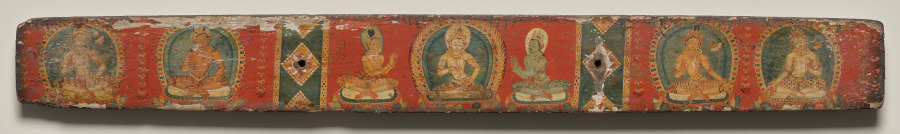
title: Four bodhisattvas and two attendants flanking Vajrasattva, bottom cover, from a Manuscript of the Perfection of Wisdom in Eight Thousand Lines (Ashtasahasrika Prajnaparamita-sutra)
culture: Eastern India, Bihar, Vikramashila Monastery. Painting: Nepal, Kathmandu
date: Sunday, September 14, 1119 (year 239 of the Newar Samvat in the month of Ashvina)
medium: Gum tempera, paper, and colors on wood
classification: Painting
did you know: The diamond pattern at the holes references the ribbons and cords that would have bound the book together.